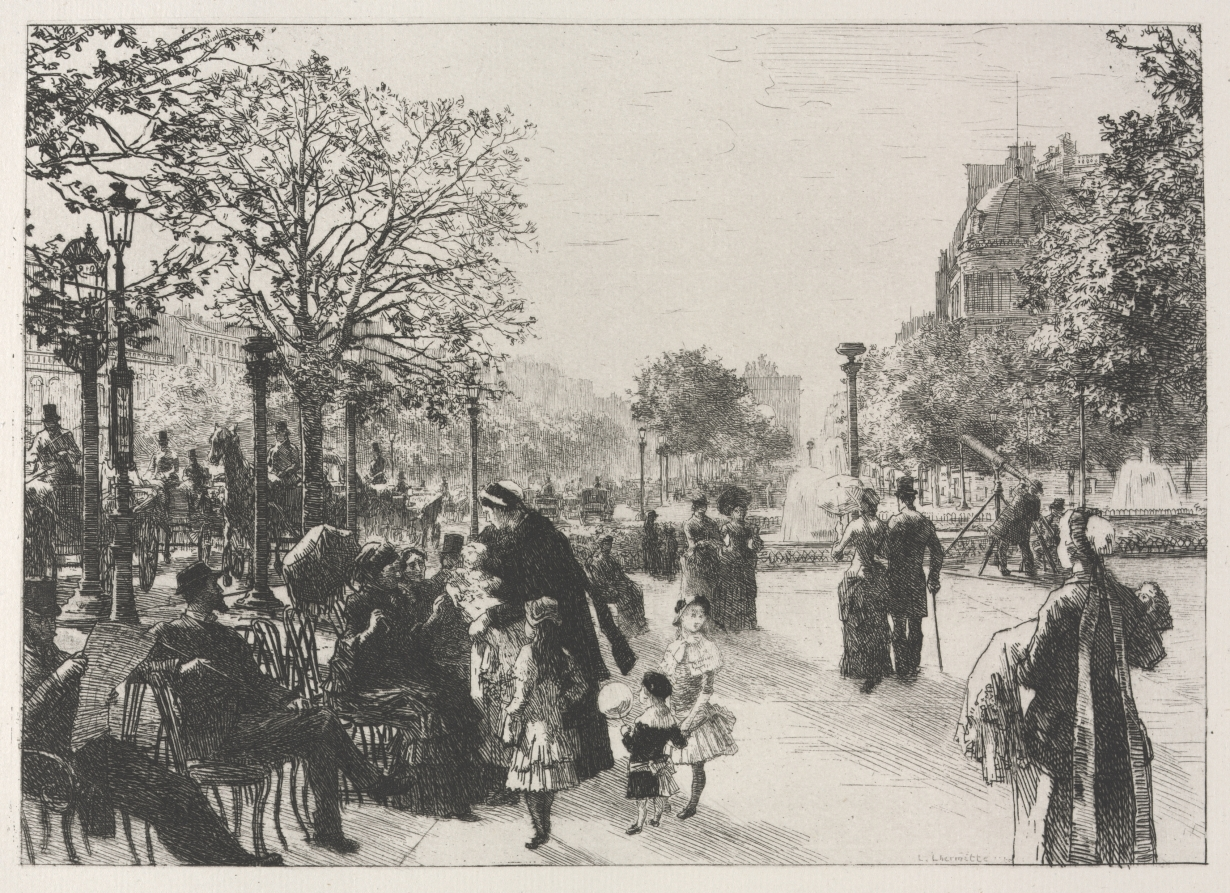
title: Tuileries Gardens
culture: France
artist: Léon Augustin Lhermitte (French, 1844–1925)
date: 1884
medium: etching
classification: Print